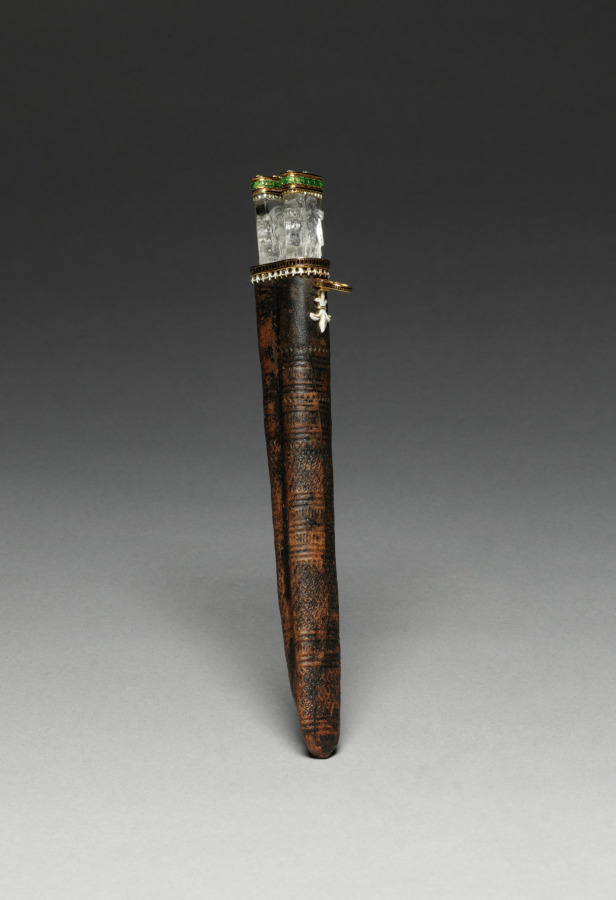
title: Knife and Fork with Sheath Set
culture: Italy, Venice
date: late 1500s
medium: gold, enamel, crystal, steel, leather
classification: Enamel